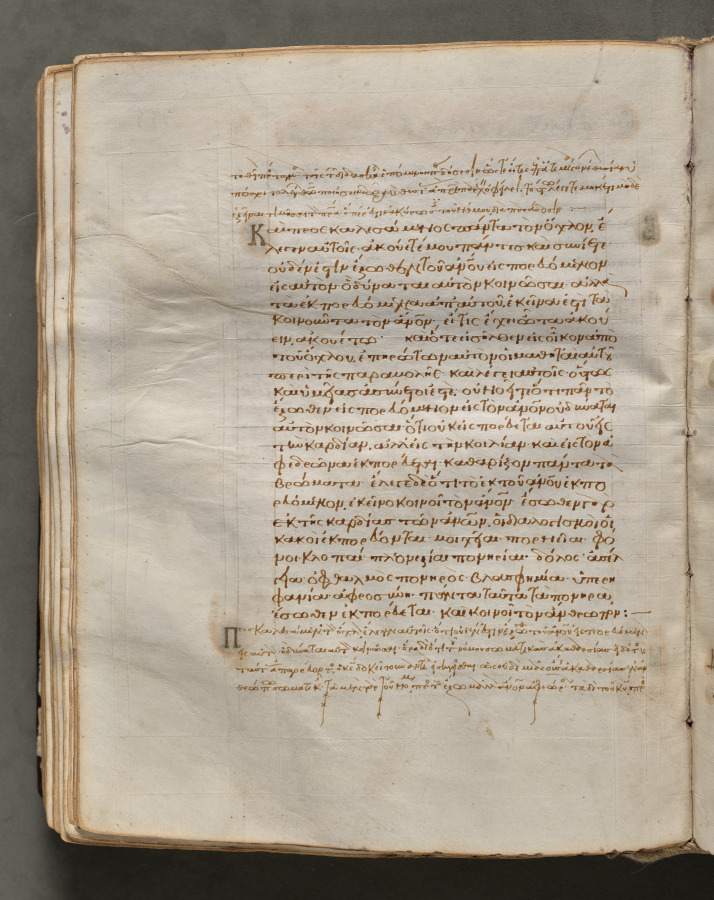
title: Text, folio 155 (verso), from a Gospel Book with Commentaries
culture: Byzantium, Constantinople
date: c. 1000–1100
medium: ink, tempera, and gold on vellum; leather binding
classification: Bound Volume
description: Each of the four gospels in this book opens on a page with brilliantly illuminated borders depicting the author of the text as well as birds-principally peacocks, symbols of the immortality of the soul-and fountains, representing the fountain of life and the salvation of the soul. This volume consists of 428 leaves with texts in Greek. Its level of sophistication suggests that it was probably written and decorated in a monastery in Constantinople.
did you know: Gospel Books were carried in procession through Byzantine churches.